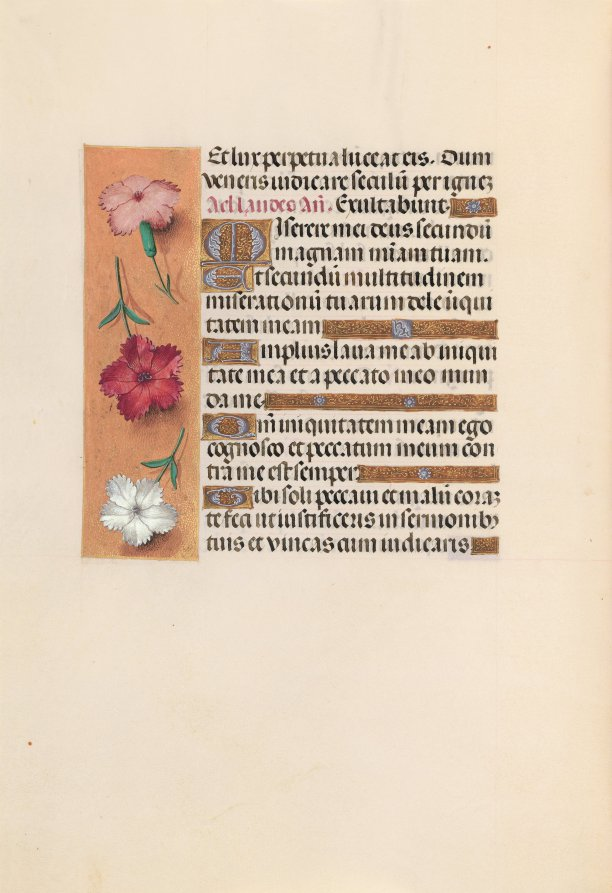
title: Hours of Queen Isabella the Catholic, Queen of Spain: Fol. 246v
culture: Flanders, Ghent and Bruges, late 15th century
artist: Master of the First Prayerbook of Maximillian (Flemish, c. 1444–1519)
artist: and Associates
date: c. 1500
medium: ink, tempera, and gold on vellum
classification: Bound Volume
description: This manuscript was illuminated by a circle of at least five highly organized manuscript painters active in the Flemish cities of Ghent and Bruges. The principal illuminator was Alexander Bening, who painted the majority of the book's miniatures. Manuscripts produced by this circle of artists are renowned for the decoration of their borders, which typically feature a rich variety of realistically-painted flowers, birds, and butterflies. This prayer book, called a book of hours, was intended not for a cleric, but for the private devotions of a lay person-in this case, Isabella the Catholic, Queen of Spain (1451-1504). Isabella's coat of arms embellishes the book's frontispiece. It is unlikely that the book was commissioned by the Queen herself; rather, she probably received it as a diplomatic gift from someone courting her patronage, perhaps Cardinal Francisco Jimenez de Cisneros. A Franciscan friar, Jimenez was dependent upon Isabella for his advancement, first to the post of Queen's confessor in 1492, and then to Archbishop of Toledo in 1495.